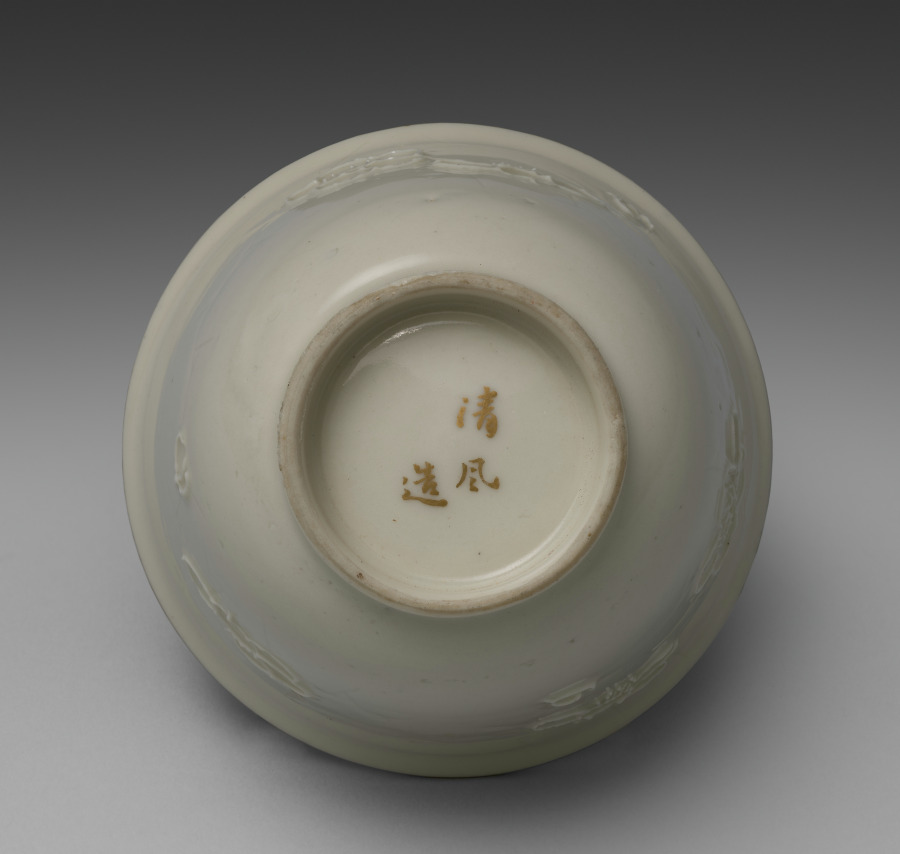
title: Drinking Cup from Dining Set with Plum Blossoms and Cracked-Ice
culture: Japan, Meiji period (1868–1912)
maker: Seifū Yohei II (Japanese, 1844–1878)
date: c. 1875–78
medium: Porcelain with molded designs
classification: Ceramic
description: Each item in this set has a delicate low-relief design of flowering plum branches over scattered, intersecting lines meant to resemble the cracked-ice surface of a frozen body of water and is signed on the base in gold pigment. While Yohei II produced many fine works in underglaze blue, like those produced by Kiyomizu Shichibei, he also made works in quite different styles later in his career, from the early 1870 s. In 1873, he was appointed purveyor to the Industrial Center of Kyoto Prefecture, a designation associated with Kyoto’s efforts to reach an international market through the port of Kobe; and from 1875 until his death, he was involved in national-level projects to present Japanese ceramics across the world. It was during this period that Yohei III was apprenticed to Yohei II, and it has been suggested that this set may in fact be an early example of Yohei III’s work, which he signed with his teacher’s name. Decorated with flowers resembling Japanese textile motifs, the set calls to mind the design of Yohei II’s pair of vases with plum blossoms in the Victoria and Albert Museum. Here, the elaborate trees created for a formal public exhibition setting have been translated into the approachable blossoms of the genteel domestic environment. While the designs are consistent across the pieces, each raised flower petal and pistil and each incised line in the ice was done by hand, so the cups, bowls, and dishes are similar yet unique. The bottoms of two boxes once identified the set’s owner, but the information has been deliberately obscured with black ink. However, inscriptions still visible appear to indicate two occasions, once at the end of July 1886 , and once again in June 1916 , when parts of the set were requested from Hokura in Niigata Prefecture. The location corresponds to a neighborhood in the present-day city of Jōetsu. The surname Tsuji 辻 also appears on a paper tag affixed to one of the box cloths. Future research may possibly reveal more about their provenance. A vase by Yohei III in a private collection combines the formal grandeur of the Yohei II vases in the Victoria and Albert Museum with the gentler design of this dining set, placing flowering plum trees against soft, scalloped-edge clouds resembling those in golden screens.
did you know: The dining wares have a creamy white coloration that the four boxes containing them identify as Korean in style.